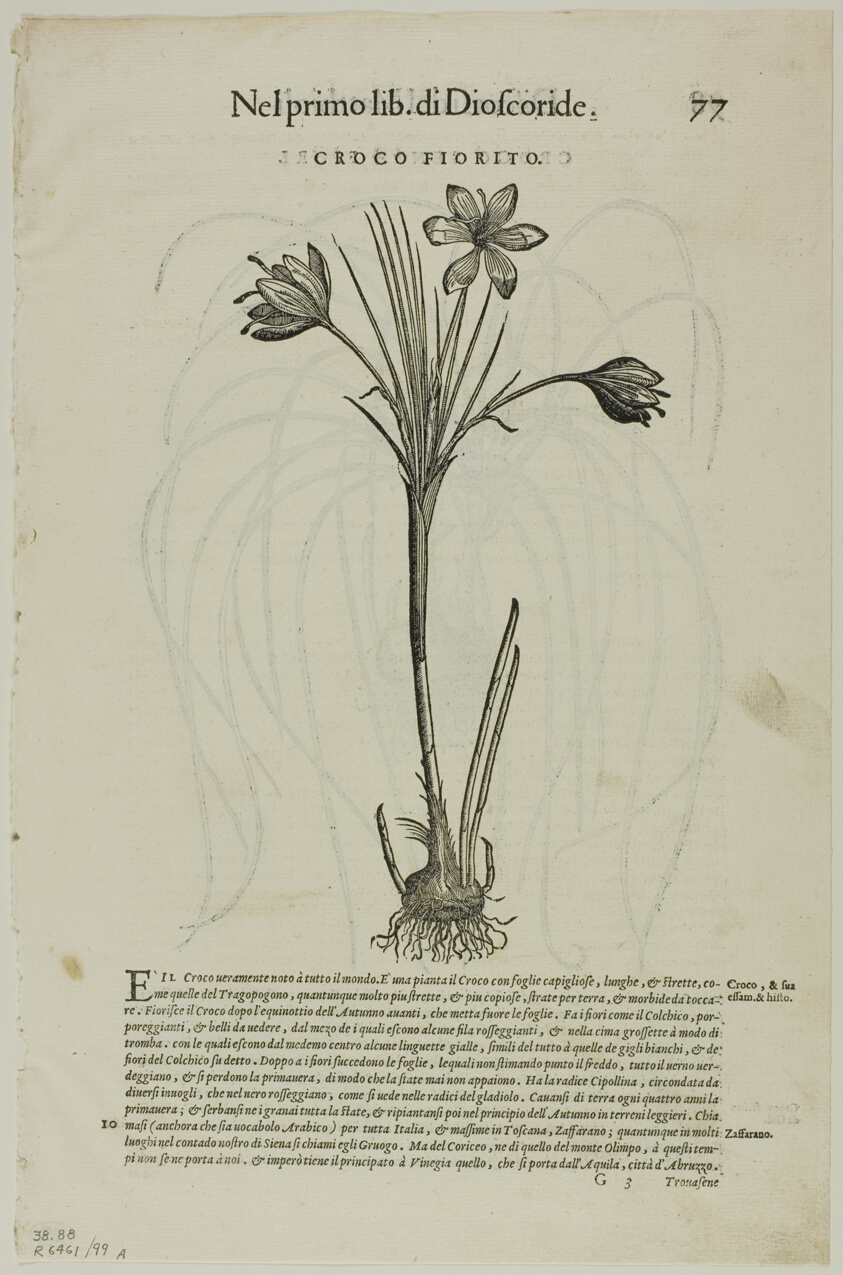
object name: Print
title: Leaf from Discorsi by Petrus Andreas Matthiolus, plate 99 from Woodcuts from Books of the XVI Century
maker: Unknown Artist (Italian, 16th century); assembled by Max Geisberg (Swiss, 1875-1943)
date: 1565, assembled into portfolio 1937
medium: Woodcut on paper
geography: Italy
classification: woodcut; print; prints and drawing